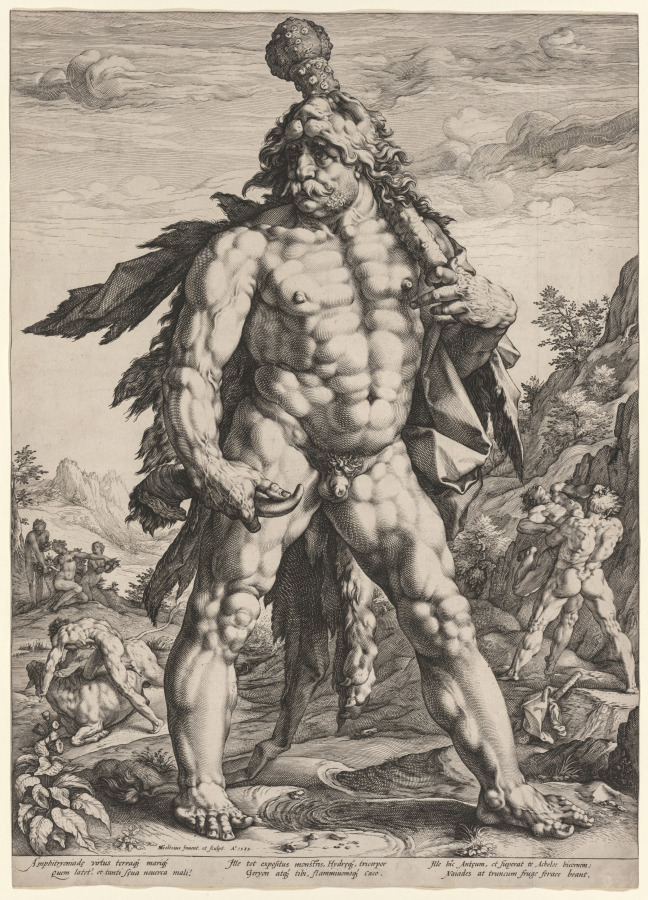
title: The Great Hercules or 'Knollenman'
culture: Netherlands, 16th century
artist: Hendrick Goltzius (Dutch, 1558–1617)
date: 1589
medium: engraving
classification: Print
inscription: lower left, in plate: HG[in monogram]oltzius Invent. et sculpt. A°.1589. ; across bottom, in plate: Amphityoniadae virtus terraque marique / Quem latet? et tanti saeua nouerca mali? / Ille tot expositus monstris, Hydraeque, tricorpor / Geryon atque tibi, flammiuomoque Caco. / Ille hîc Antaeum, et superat te Acheloe bicornem; / Naiades at truncum fruge ferace beant.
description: The exaggerated and unnatural musculature of this figure may suggest that the Netherlandish artist Hendrick Goltzius had never studied a real human body. Indeed, he pulled from a mixture of sources including classical sculpture, Italian art, and his imagination. Goltzius ushered in Mannerism in Northern Europe, a style that featured exaggerated forms and metaphorical and allegorical subject matter. Known for his skill with an engraving burin, he transformed the technique, creating engraved lines that taper and swell to emphasize volume and form to extreme effect.